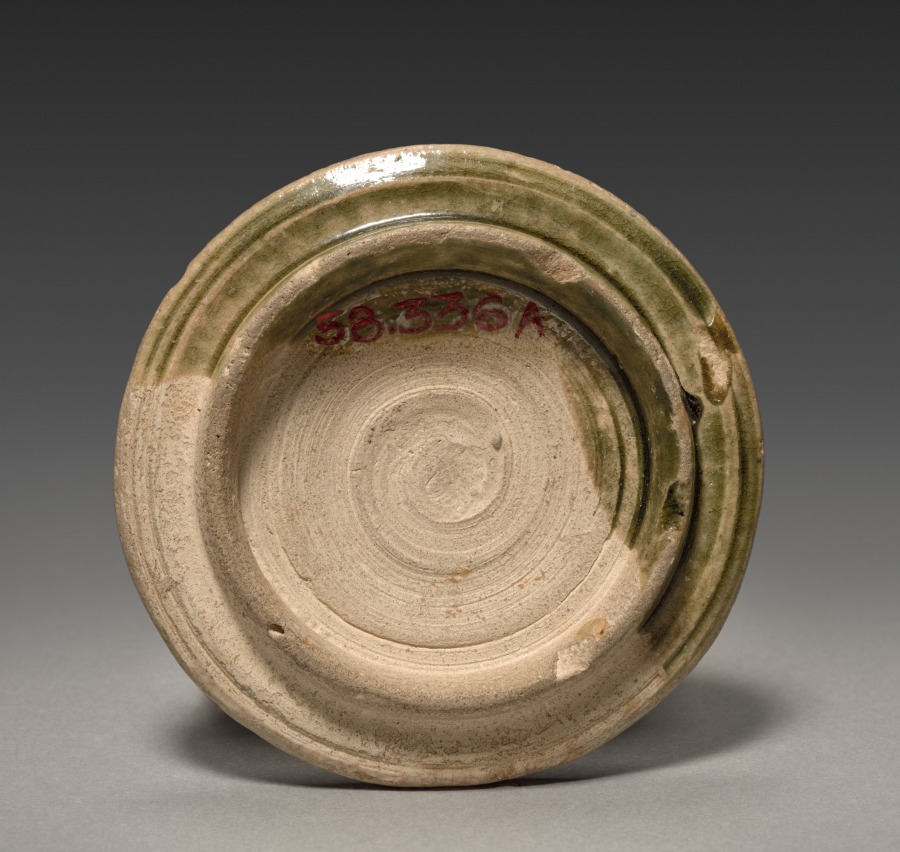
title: Ewer (Suichū) (lid)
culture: Japan, Momoyama period (1573–1615)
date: early 1600s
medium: Glazed stoneware with iron oxide underglaze slip (Mino ware, Oribe type)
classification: Ceramic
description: This ewer was made to replenish the jar that holds water for rinsing teabowls and filling the iron kettle at tea gatherings. Highly abstracted pine trees, cascading ivy, stripes, and grids make up the designs in underglaze iron oxide, while the overall surface alternates between a transparent glaze and a green glaze characteristic of some Oribe tea wares.